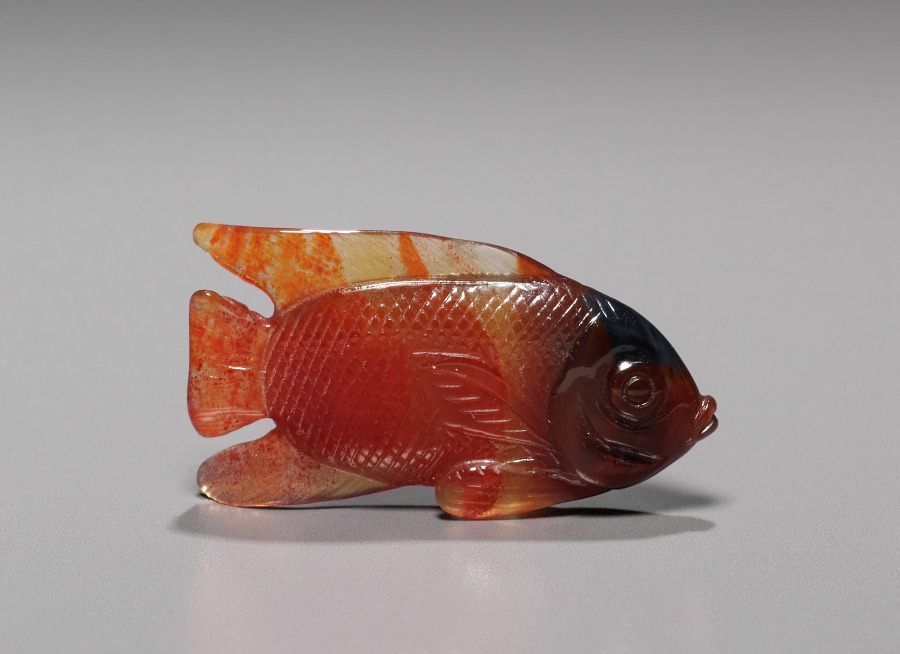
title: Fish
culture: Russia, St. Petersburg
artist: House of Fabergé (Russian, 1842–1918)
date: c. 1890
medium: agate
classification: Miscellaneous